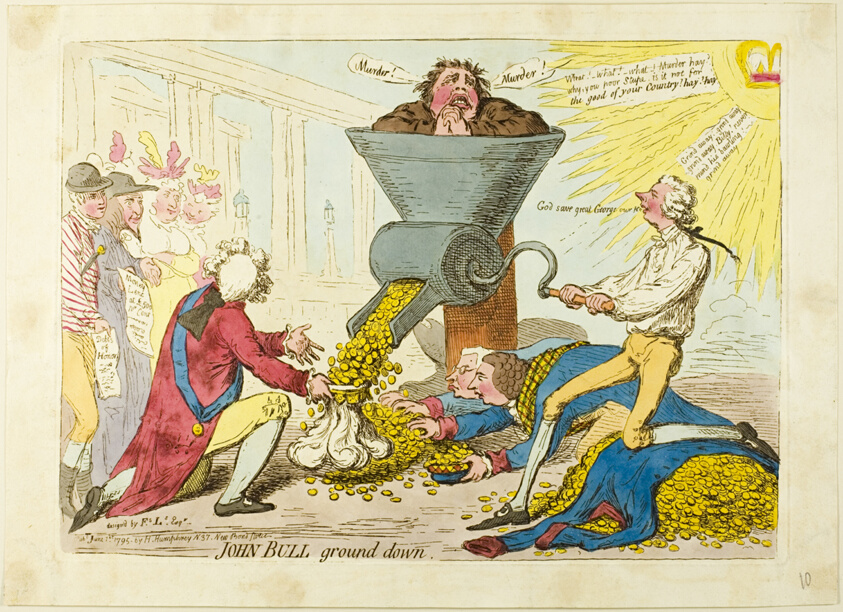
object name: Print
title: John Bull Ground Down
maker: James Gillray (English, 1756-1815); published by Hannah Humphrey (English, c. 1745-1818)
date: published June 1, 1795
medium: Etching in dark brown, with handcoloring, on cream wove paper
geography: England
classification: etching; print; prints and drawing